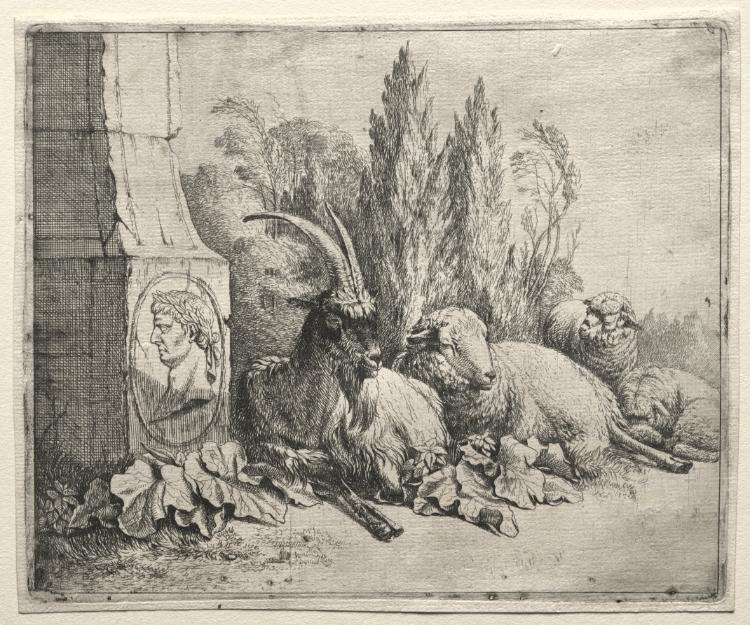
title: Bust at the Bottom of a Pyramid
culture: Germany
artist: Johann Heinrich Roos (German, 1631–1685)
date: 1665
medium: etching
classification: Print